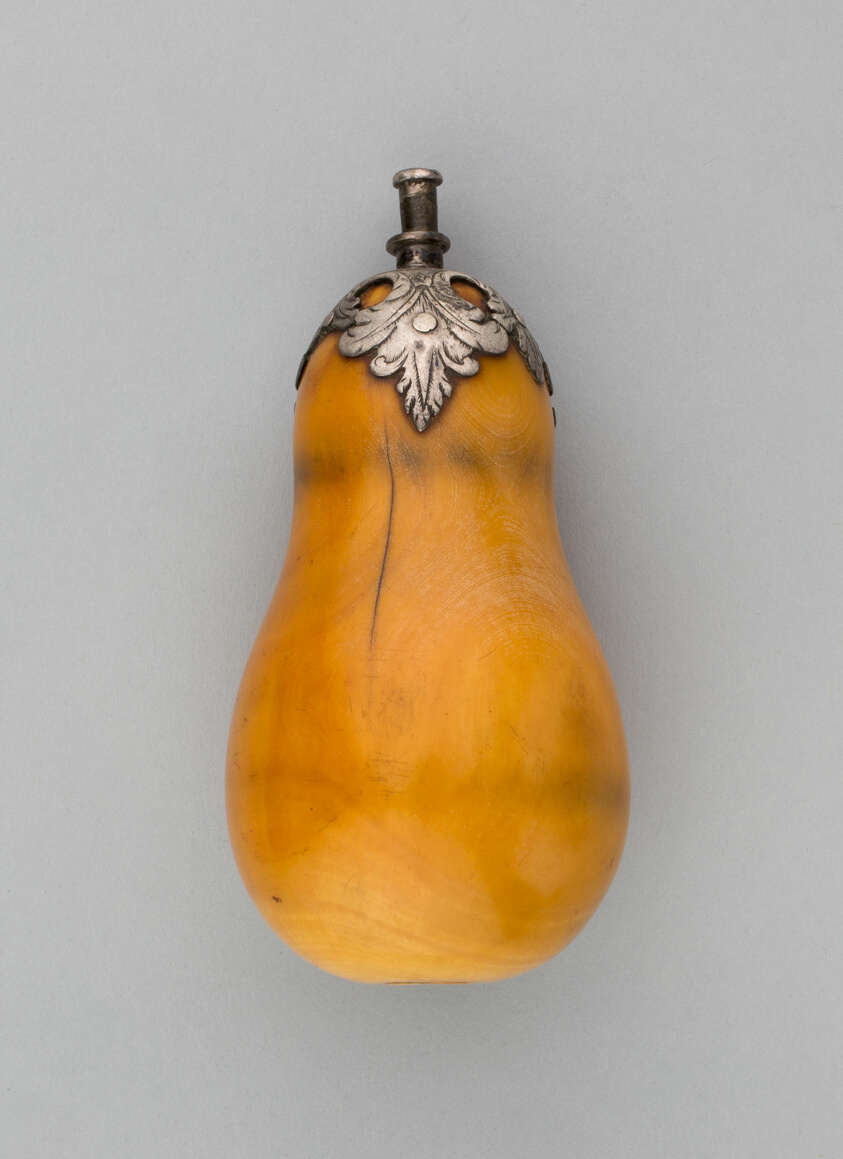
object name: Arms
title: Priming Flask or Sander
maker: French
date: c. 1700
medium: Ivory and silver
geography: France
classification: firearm-accessory; arms; arms and armor